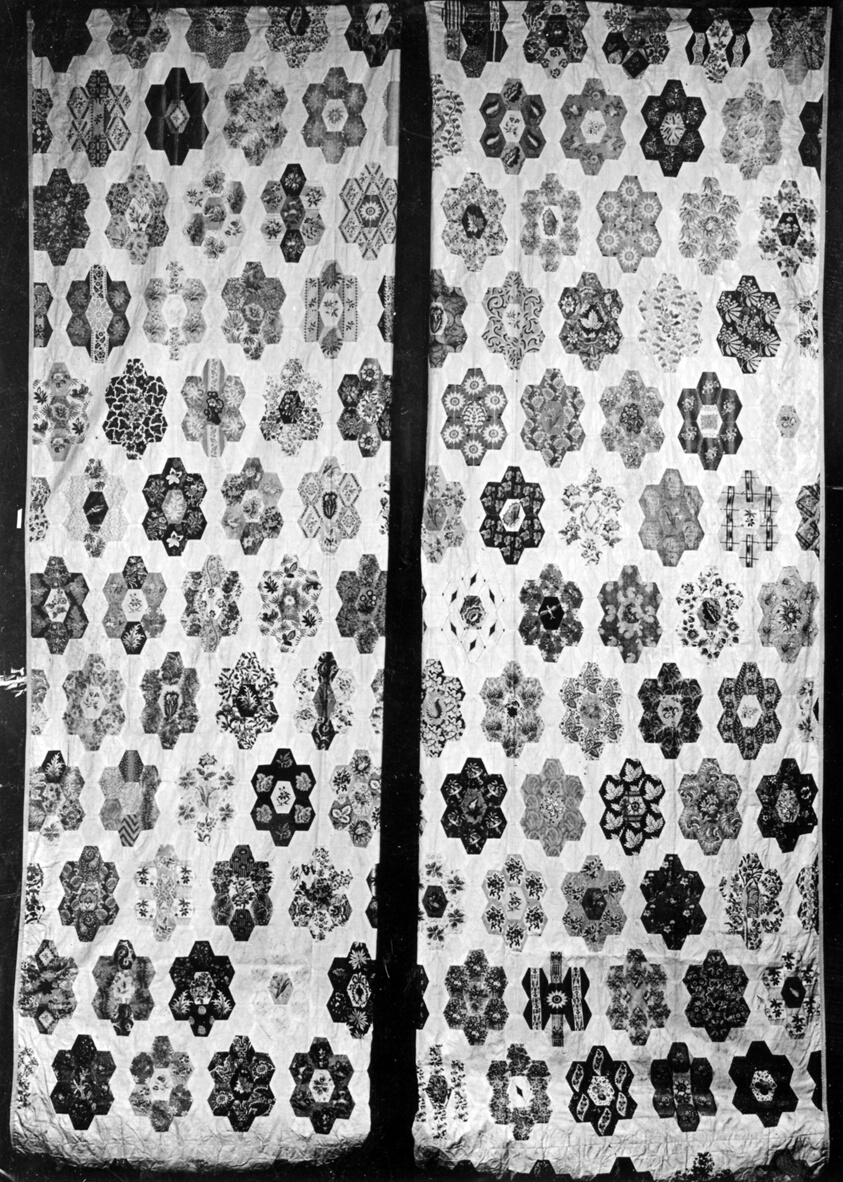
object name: Textile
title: Curtain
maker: England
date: 18th/19th century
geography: England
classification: textile; needlework (visual works)